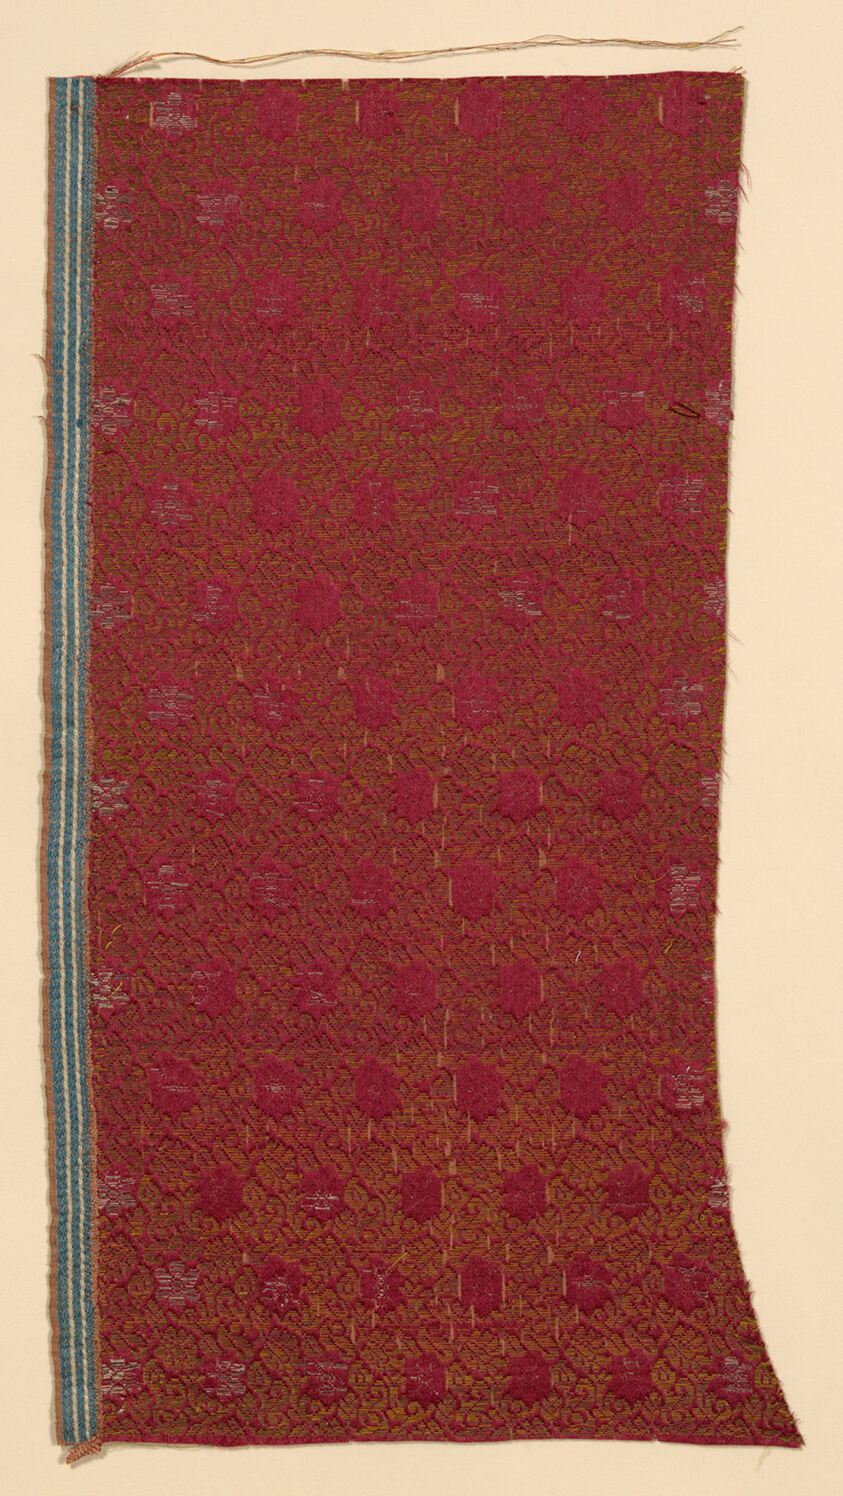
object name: Textile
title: Fragment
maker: Spain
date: 17th century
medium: Silk and silvered- and gilt-metal-strip-wrapped silk (frisé), warp-float faced satin weave with supplementary patterning wefts and supplementary brocading wefts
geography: Spain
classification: textile; weaving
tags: flowers